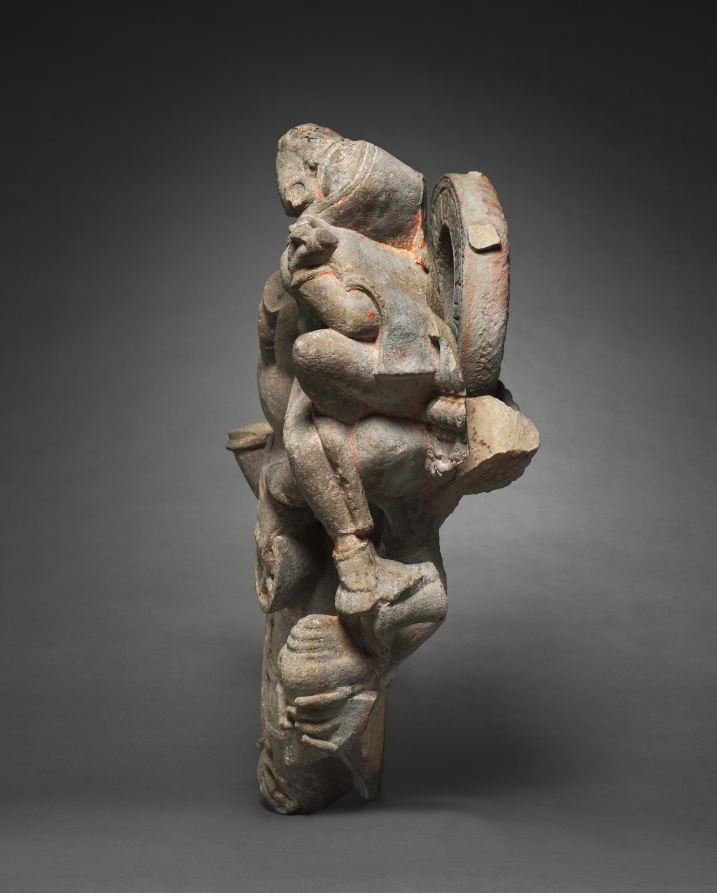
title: Varaha, Boar Incarnation of Vishnu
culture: Central India, probably Madhya Pradesh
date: 700–800s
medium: sandstone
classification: Stone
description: The Hindu god Vishnu took the form of a boar to rescue his wife Bhu (Earth in Sanskrit) from the bottom of the primordial ocean, where she had been hidden by a demon. Here shown with the head of a boar and the powerful lunging body of a warrior, Varaha holds out one of his four elbows as a seat for the earth goddess who he has rescued.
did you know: In his two left hands, he hold the conch and discus.